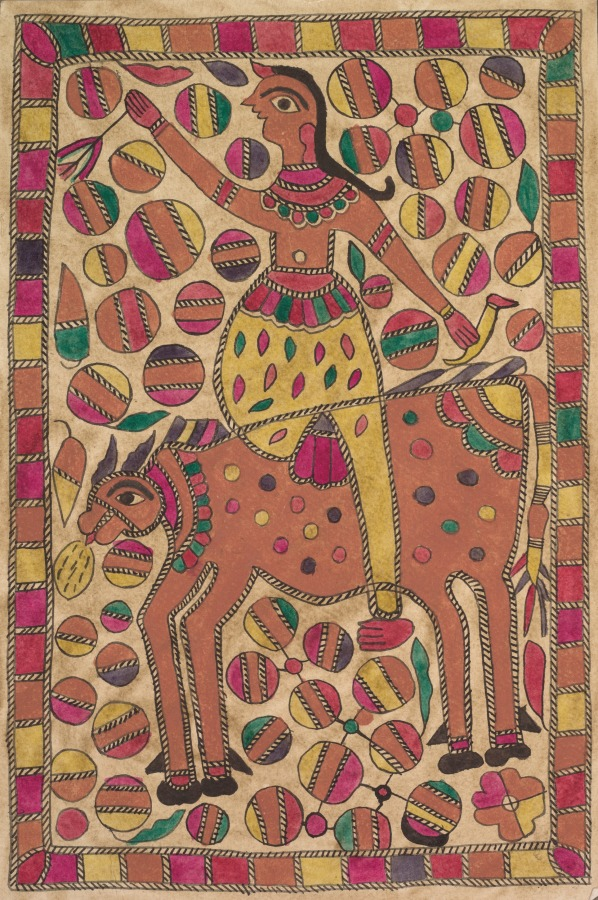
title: Rider and four-legged bovine creature with border of colored squares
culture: Eastern India, Bihar State, Mithila or Madhubani School, 20th century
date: 1900s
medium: ink and color on paper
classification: Painting